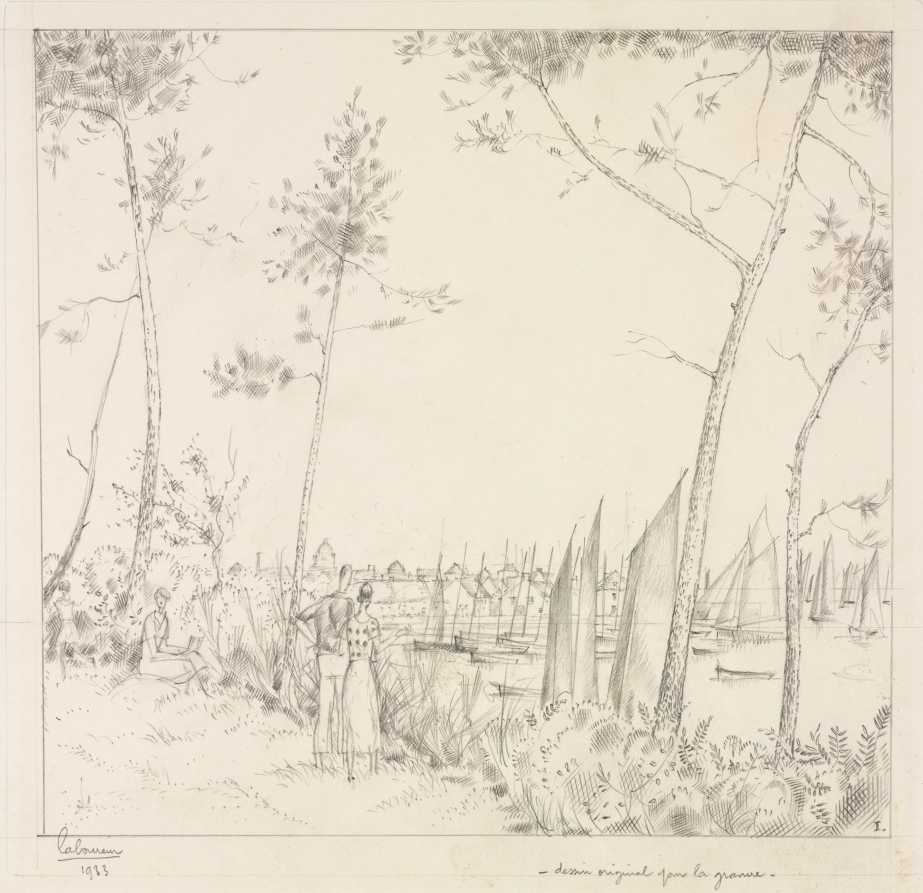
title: La Promenade sur le Port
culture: France, 20th century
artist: Jean-Émile Laboureur (French, 1877–1943)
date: 1933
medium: graphite; framing lines in graphite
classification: Drawing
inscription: signed, lower left, in graphite: laboureur [underlined] / 1933 ; by artist, lower left, in graphite: -design original pour la gravure- ; signed, lower right, in graphite: L ; upper right, in graphite: Cl. B ; upper right, in graphite: 240 [sideways] ; lower right, in graphite: 7